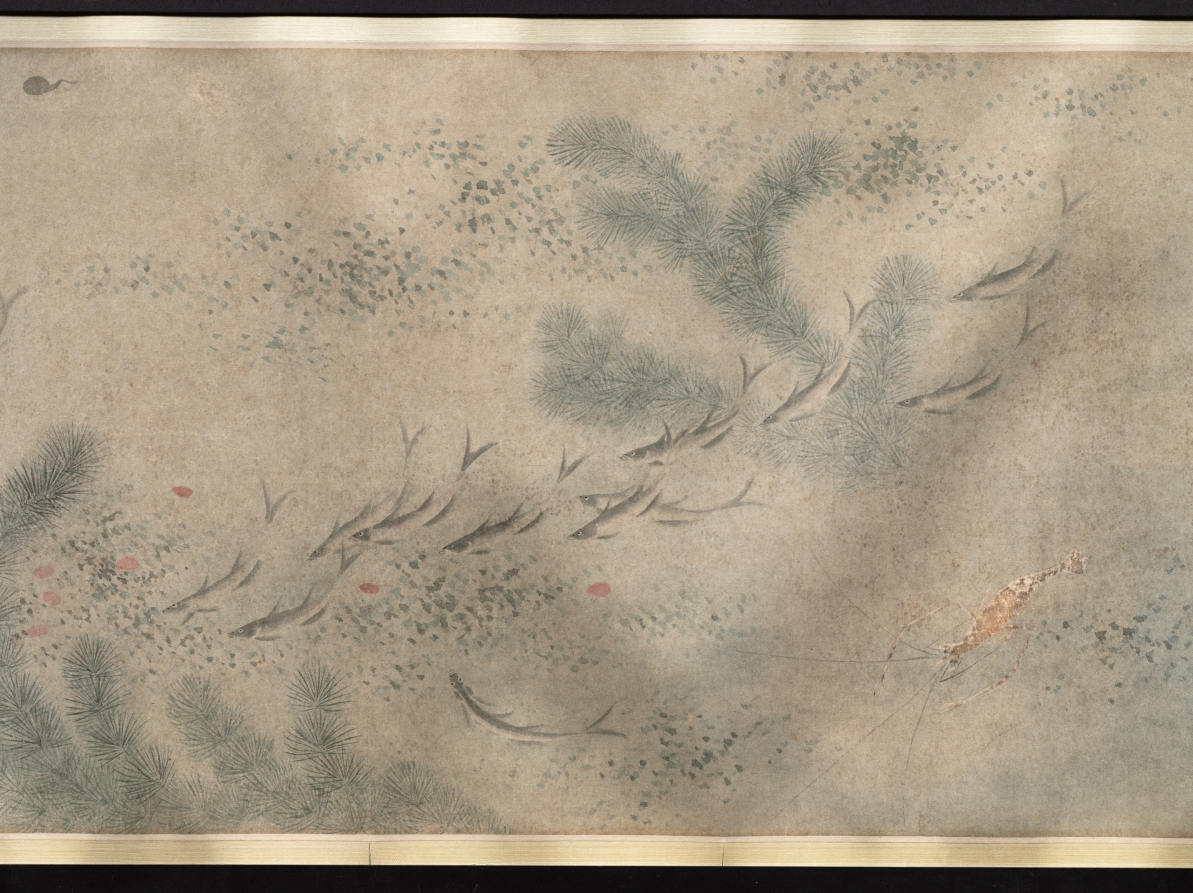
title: Insects and Flowers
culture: China, Qing dynasty (1644-1911) or Republican period (1912-49)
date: c. 1900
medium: Handscroll, ink and color on paper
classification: Painting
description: More than 26 feet long, this scroll presents insects, reptiles, and plants in delicate brushwork and pale colors, referring in style to earlier Southern Song dynasty (1127–1279) bird-and-flower paintings. Upon closer inspection, ants dismember a butterfly and reptiles wait to ambush their prey. An inscription at the end of the painting gives us an idea of its meaning: Attributed to the Qing dynasty scholar Zhang Xigeng (張錫庚, 1801–1861), the inscriber relates the work to an earlier painting by Qian Xuan (錢選, c. 1235–before 1307) and further suggests that the painting may allude to the relentlessness of natural selection. By drawing a parallel to tumultuous episodes in Chinese history, the writer might even hint at the domestic rebellions and the aggression of Western powers against China in his lifetime, particularly the Opium Wars (1839–60).